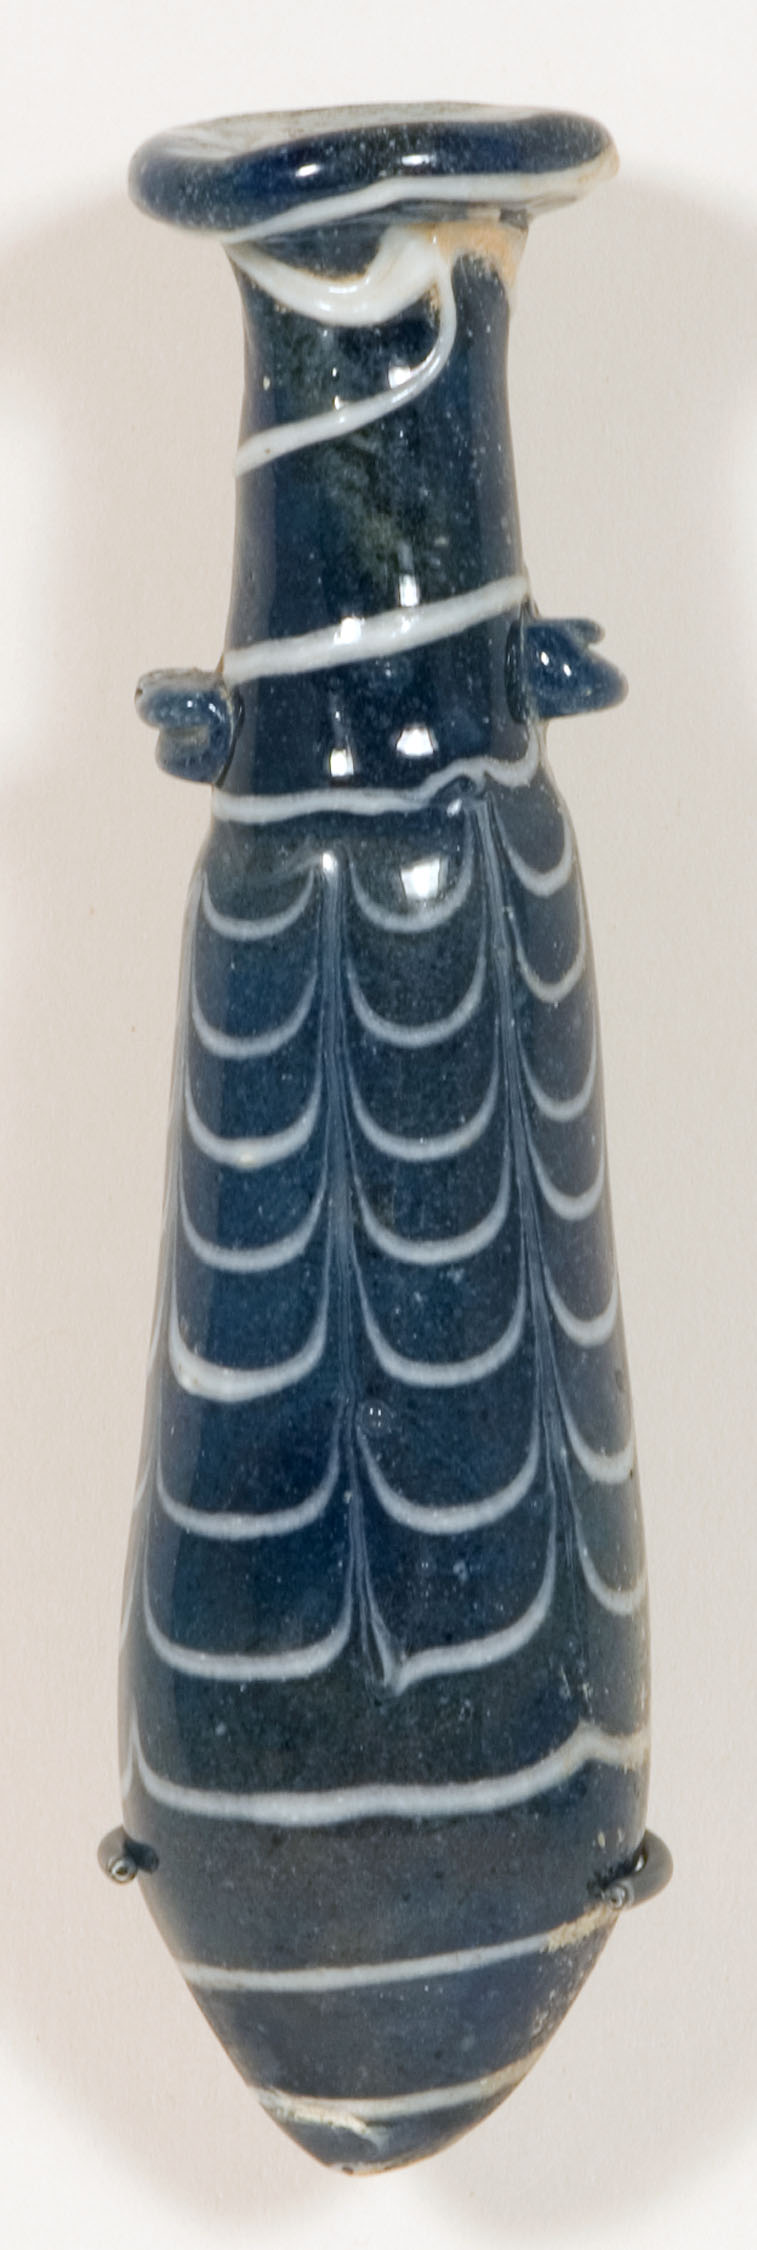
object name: Vessel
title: Alabastron (Container for Scented Oil)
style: ancient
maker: Eastern Mediterranean, possibly the Syro-Palestinian region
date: 200-150 BCE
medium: Glass, core-formed technique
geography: Mediterranean Region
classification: container; alabastron; glass; vessel; ancient art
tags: vessels, beauty